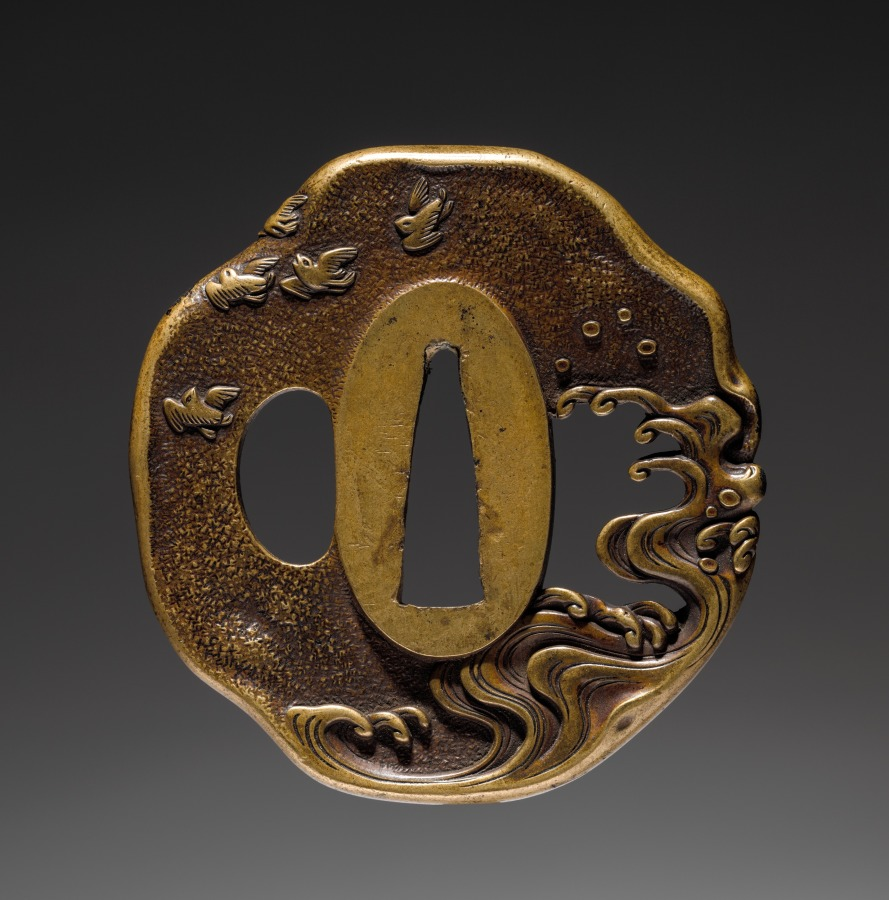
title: Sword Guard (Tsuba) with Plovers in Waves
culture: Japan, Edo period (1615–1868)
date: c. 1615–1868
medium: brass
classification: Arms and Armor